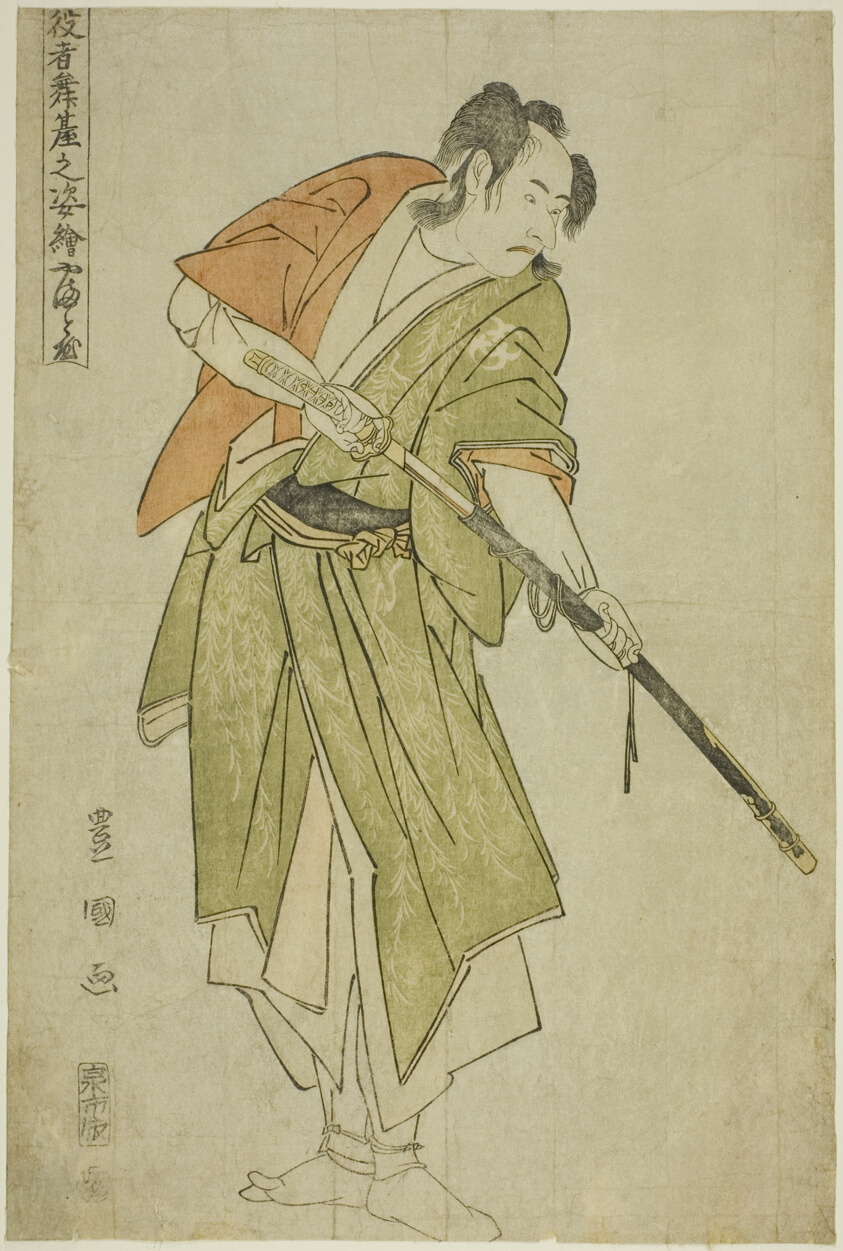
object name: Print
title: Yamatoya: Bando Mitsugoro II as Ishii Genzo, from the series "Portraits of Actors on Stage (Yakusha butai no sugata-e)"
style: Japanese (culture or style)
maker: Utagawa Toyokuni I 初代 歌川 豊国; Japanese, 1769–1825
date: 1794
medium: Color woodblock print; oban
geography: Japan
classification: woodblock print; print; asian art